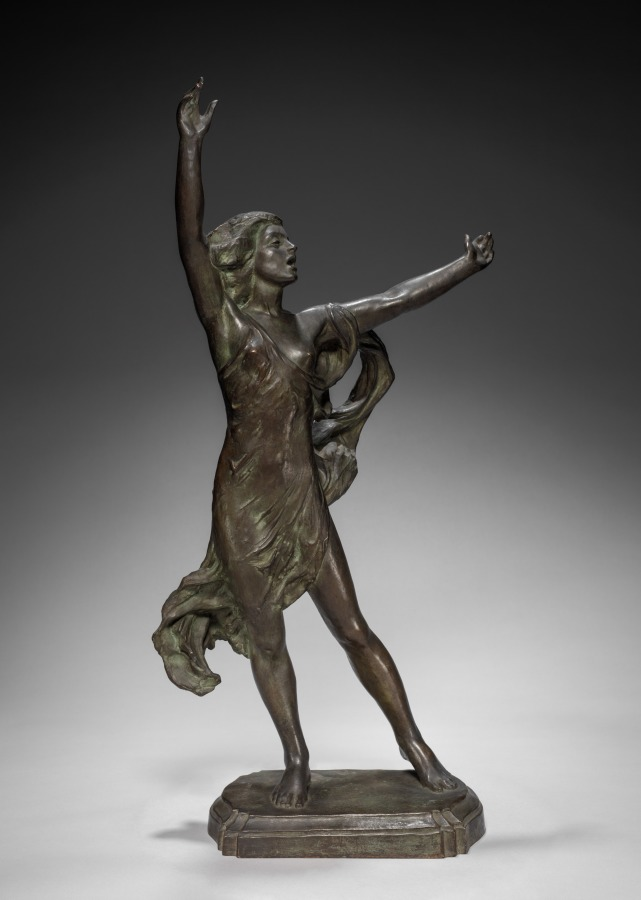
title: Pippa Passes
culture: America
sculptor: Louise Allen (American, 1880–1953)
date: c. 1916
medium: bronze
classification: Sculpture